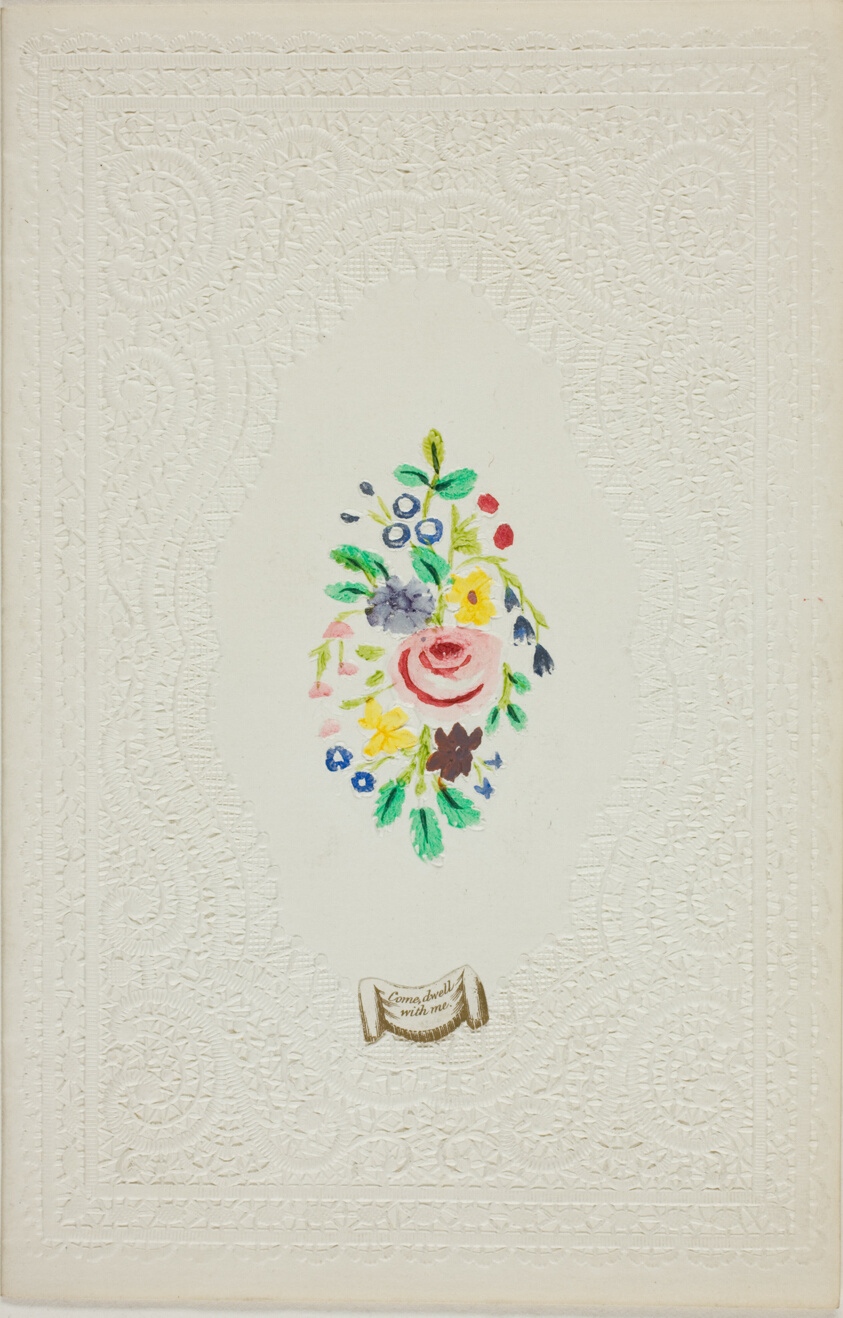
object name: Drawing and Watercolor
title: Come Dwell with Me (Valentine)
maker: Unknown Artist; English, 19th century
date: c. 1850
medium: Watercolor with a collaged element on embossed ivory laid paper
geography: England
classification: valentine; prints and drawing; paper